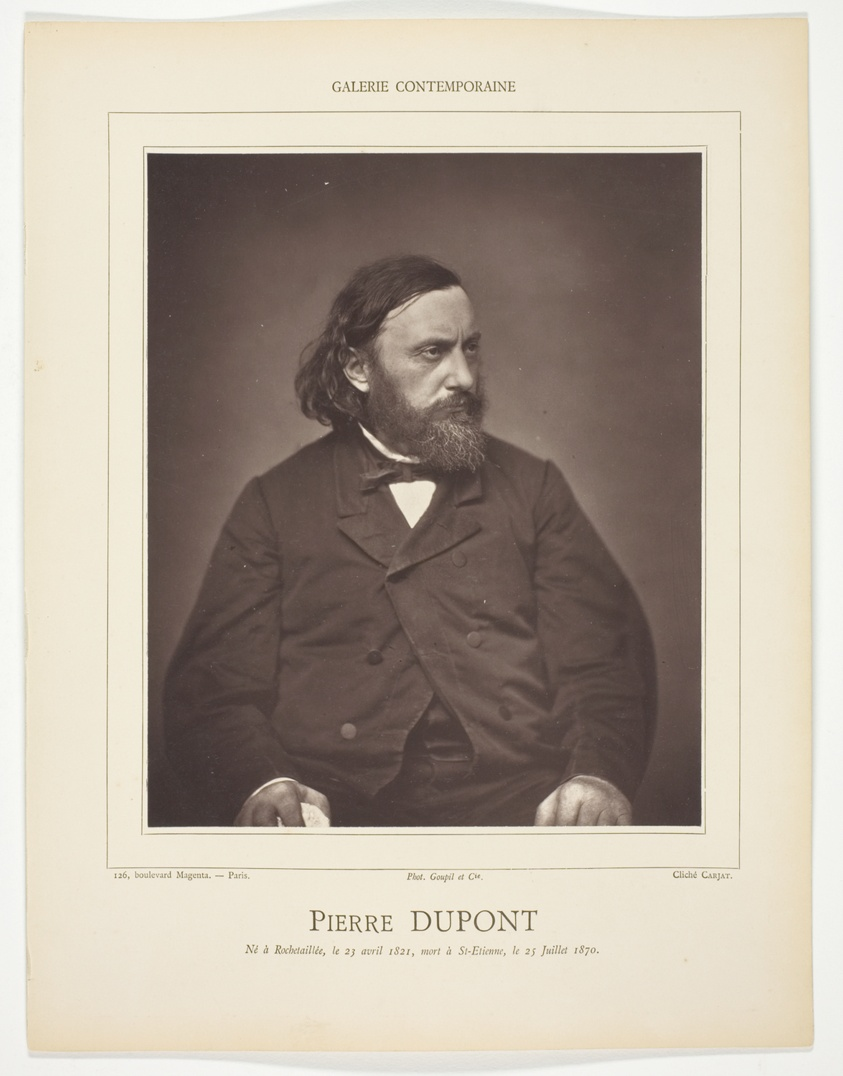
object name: Photograph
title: Pierre Dupont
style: 19th century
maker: Etienne Carjat (French, 1828–1906)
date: c. 1876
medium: Woodburytype, from the periodical “Galerie Contemporaine Littéraire, Artistique” (1878), volume 6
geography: France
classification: woodburytype; photomechanical process; photography; photograph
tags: Collected by Hugh Edwards, Contemporaine Littéraire